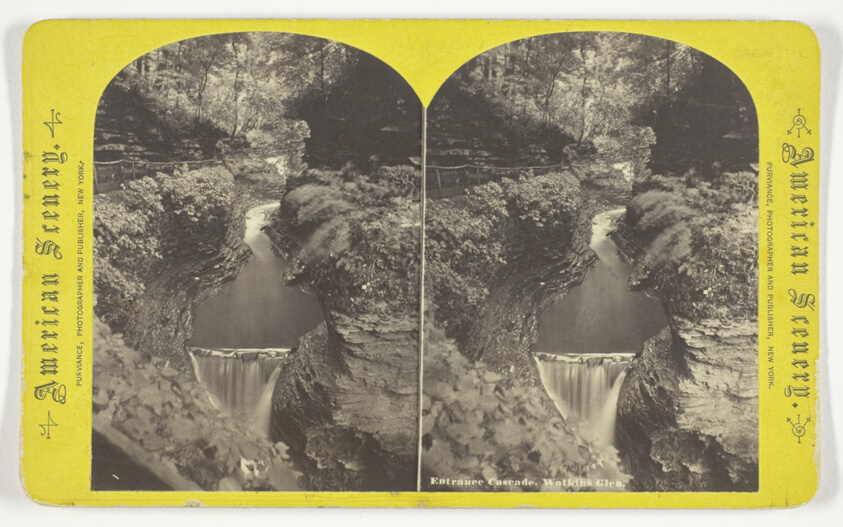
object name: Photograph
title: Entrance Cascade, Watkins Glen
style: 19th century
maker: William Purviance; American, active mid-19th century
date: 1860/68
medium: Albumen print, stereo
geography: United States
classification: stereograph (albumen); albumen silver print; photographic process; photography; photograph